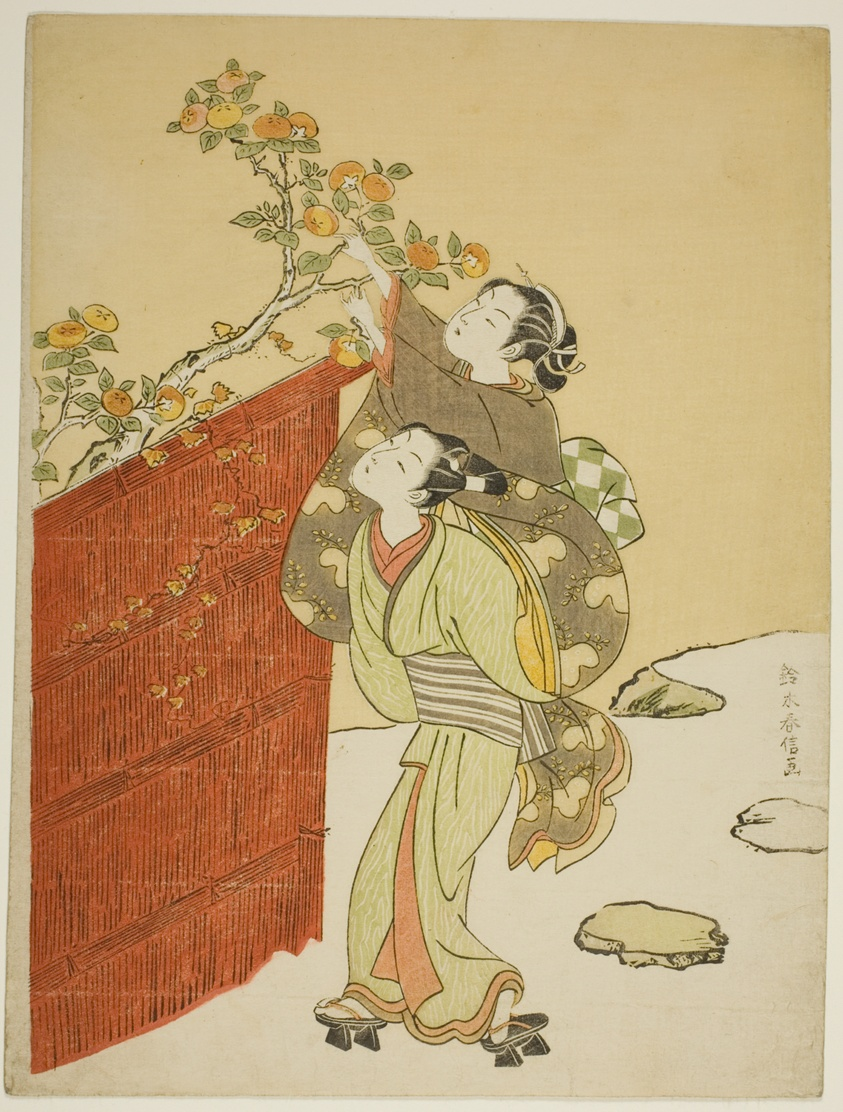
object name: Print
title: Picking Persimmons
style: Japanese (culture or style)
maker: Suzuki Harunobu 鈴木 春信; Japanese, 1725 (?)-1770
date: c. 1767/68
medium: Color woodblock print; chuban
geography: Japan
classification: woodblock print; print; asian art